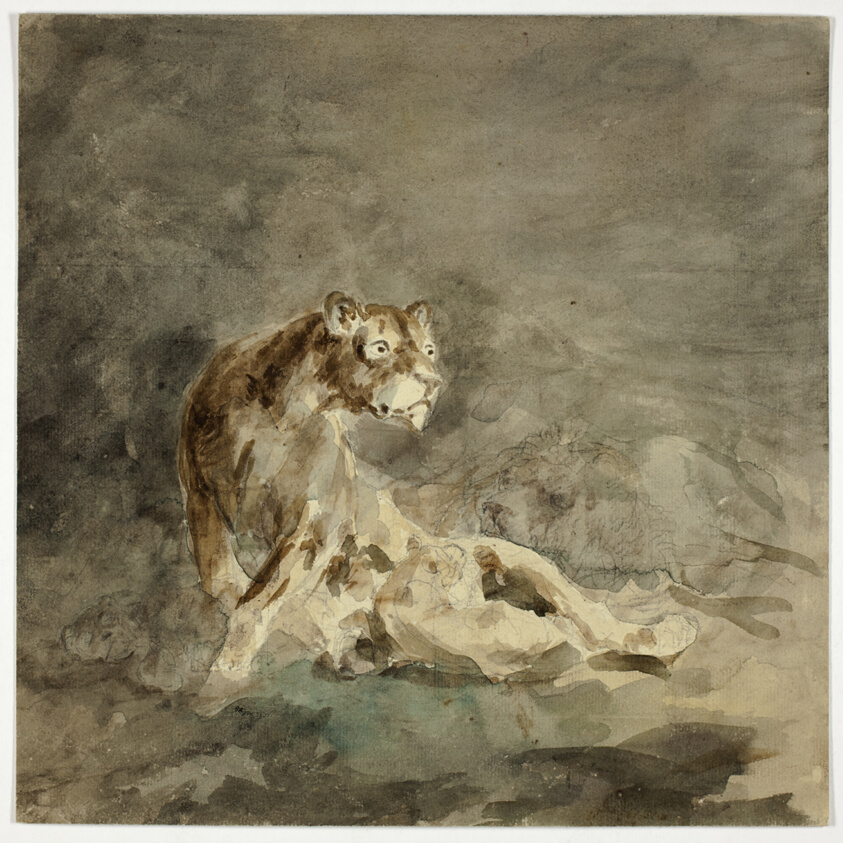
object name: Drawing and Watercolor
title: Lioness with her Family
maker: Sawrey Gilpin (English, 1733-1807)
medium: Watercolor, over graphite, on cream laid paper, laid down on cream wove paper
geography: England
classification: watercolor; paper; drawings (visual works); prints and drawing